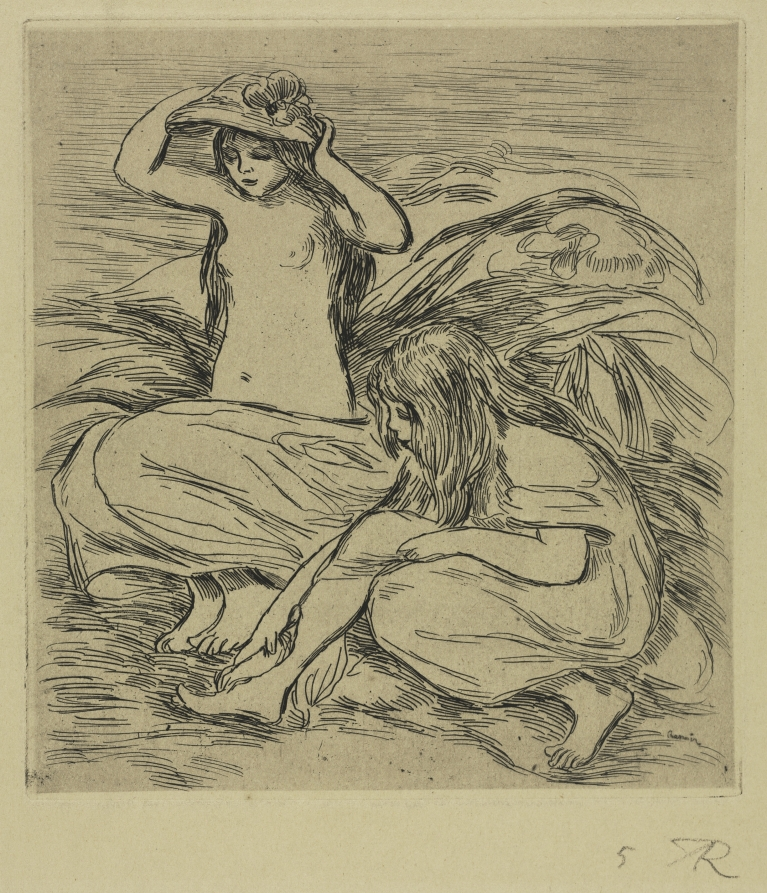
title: The Two Bathers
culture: France, 19th century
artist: Pierre-Auguste Renoir (French, 1841–1919)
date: 1895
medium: etching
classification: Print